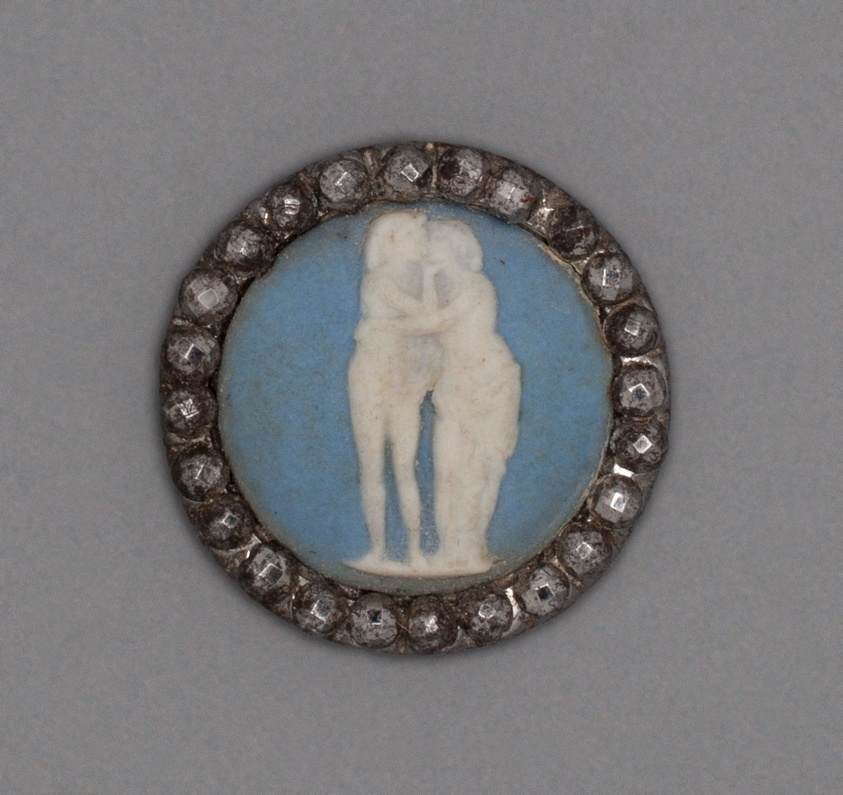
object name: Ceramics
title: Button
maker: Wedgwood Manufactory (England, founded 1759)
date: Late 18th century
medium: Stoneware (jasperware)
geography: Burslem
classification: accessories (object genre); stoneware; european decorative arts; ceramics